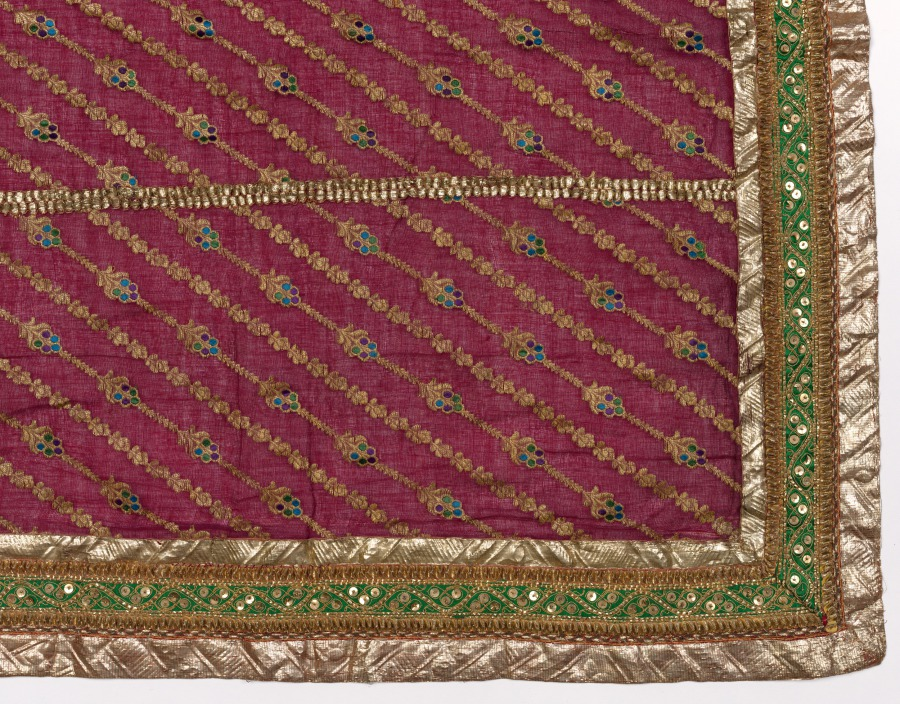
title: Sari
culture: India, 19th - early 20th century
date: 1800s - early 1900s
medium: tabby ground, brocaded and embroidered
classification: Textile